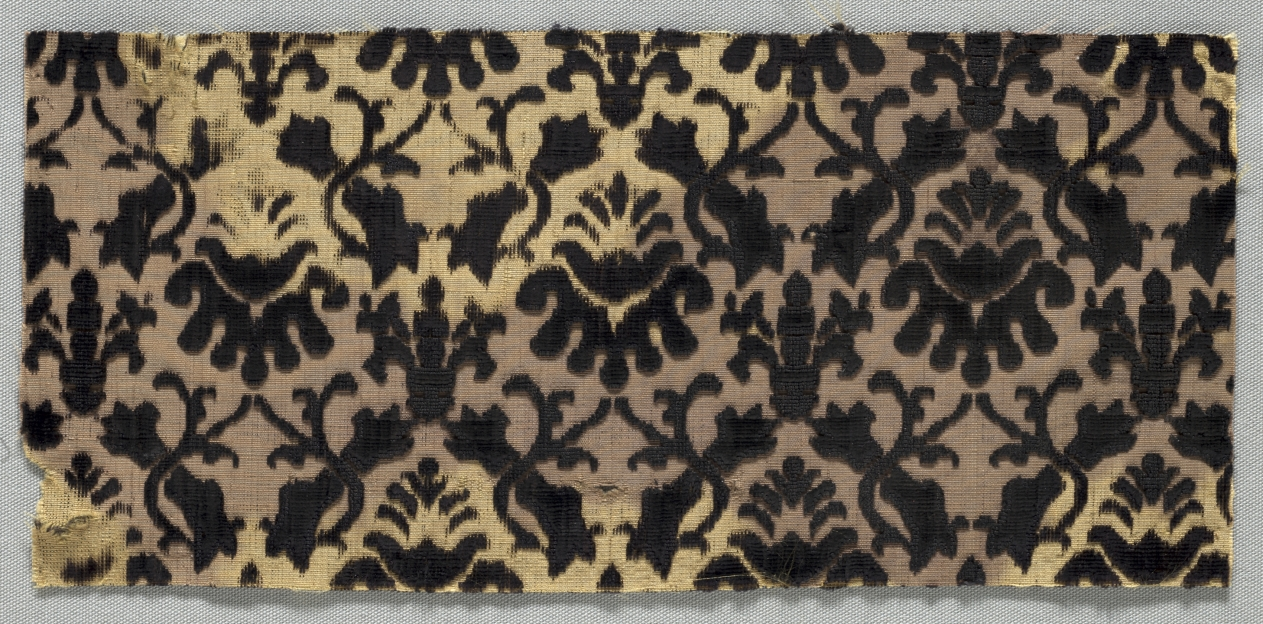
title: Velvet Textile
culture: Italy, 17th century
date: 1600s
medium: velvet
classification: Velvet